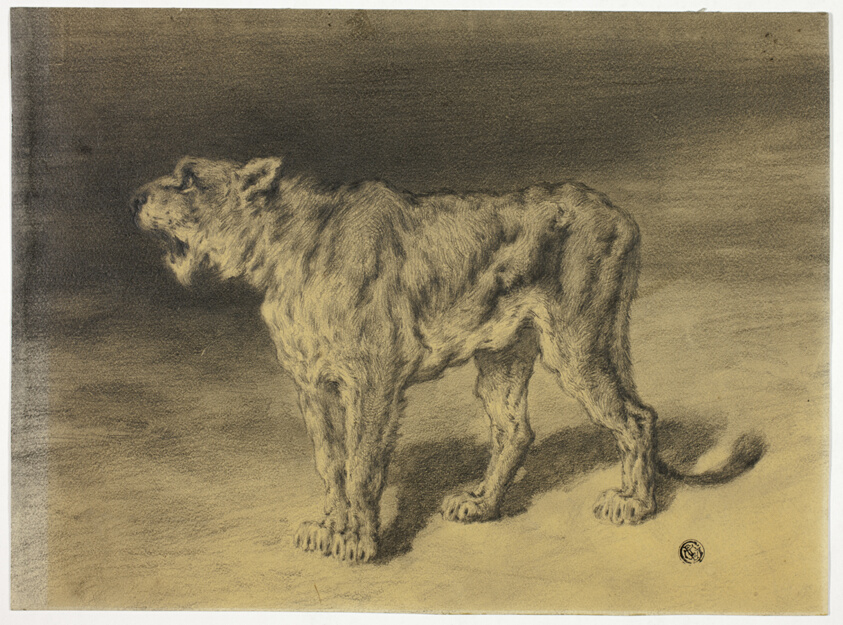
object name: Drawing and Watercolor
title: Lioness Roaring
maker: Frederik William Zurcher (Dutch, 1835-1894)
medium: Graphite on cream wove paper (discolored to tan)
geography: Holland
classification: graphite; drawings (visual works); prints and drawing